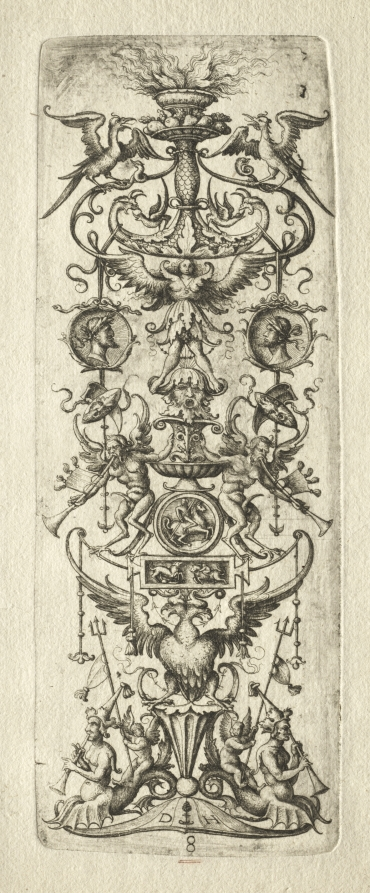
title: Ornament Fillet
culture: Germany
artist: Daniel Hopfer (German, c. 1470–1536)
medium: etching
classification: Print